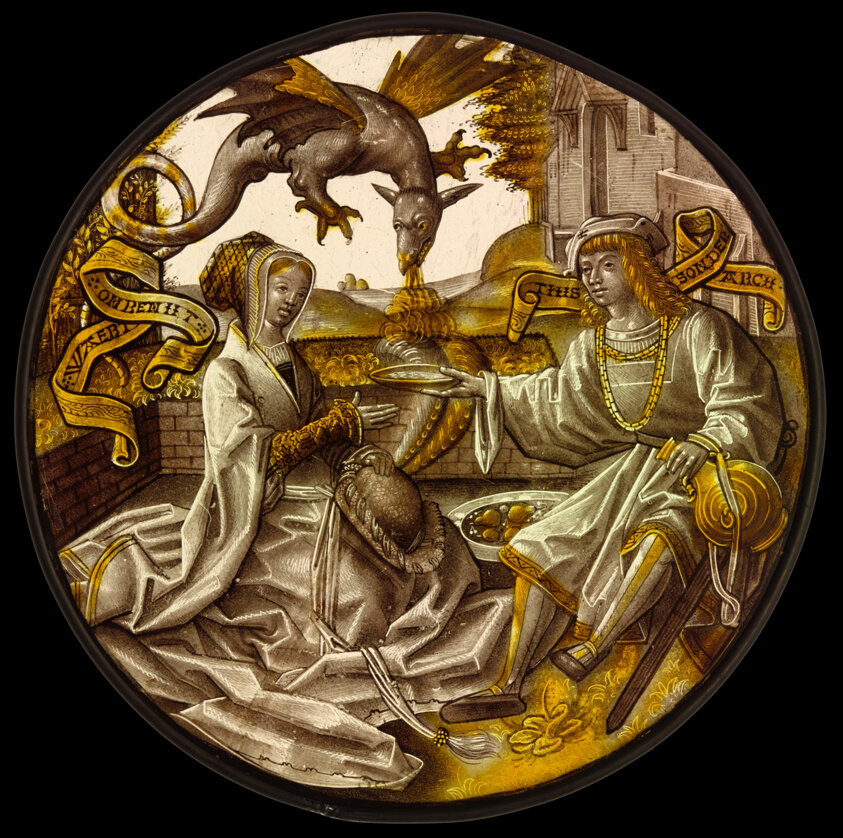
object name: Glass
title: Lovers in a Garden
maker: Northern Netherlandish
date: 1520/30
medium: Glass, vitreous paint, and silver stain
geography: Netherlands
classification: stained glass/leaded glass; glass; european decorative arts; decorative arts